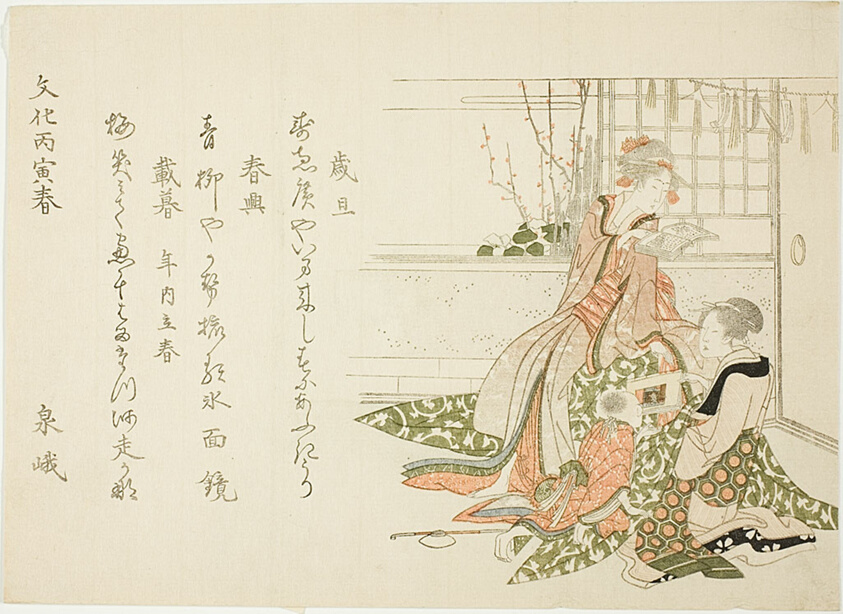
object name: Print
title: Women Reading Book and Babysitting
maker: Senga (Japanese, date unknown)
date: 1806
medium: Color woodblock print; surimono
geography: Japan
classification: woodblock print; print; asian art